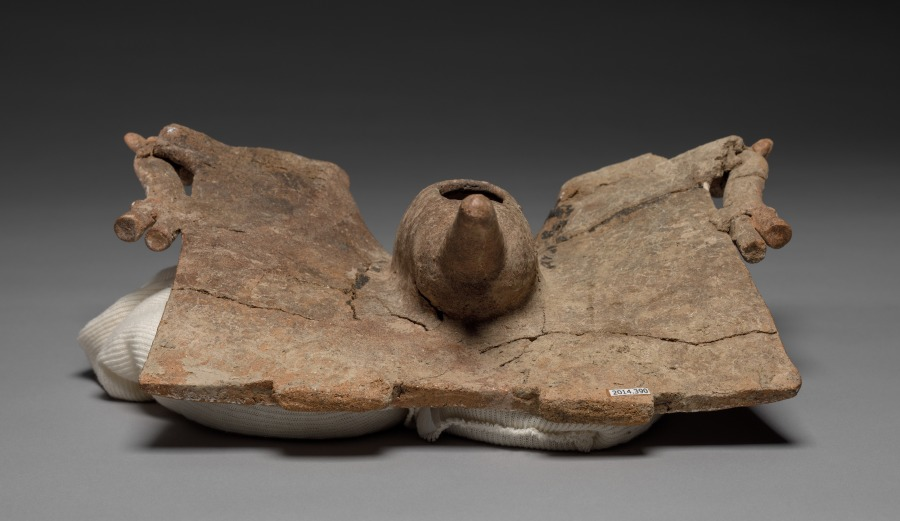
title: Standing Female Figure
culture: Mesoamerica, Veracruz, Nopiloa style?, 7th-10th century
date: 600–1000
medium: ceramic, pigment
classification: Sculpture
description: Ancient Veracruz artists used ceramic to create figural sculptures in a range of sizes, styles, and types. This beautiful, finely wrought female figure is an exceptional example. Although her identity is unknown, her adornments signal high status: ear ornaments, a large necklace, an elaborate dress that drapes over her outstretched arms, and perhaps even her front teeth, filed into a T shape, may have symbolic importance. The unfinished back, with a tripod support, suggests that the figure was meant to be seen from the front.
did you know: This lovely female’s body is a flat plaque supported by a tripod at the rear.